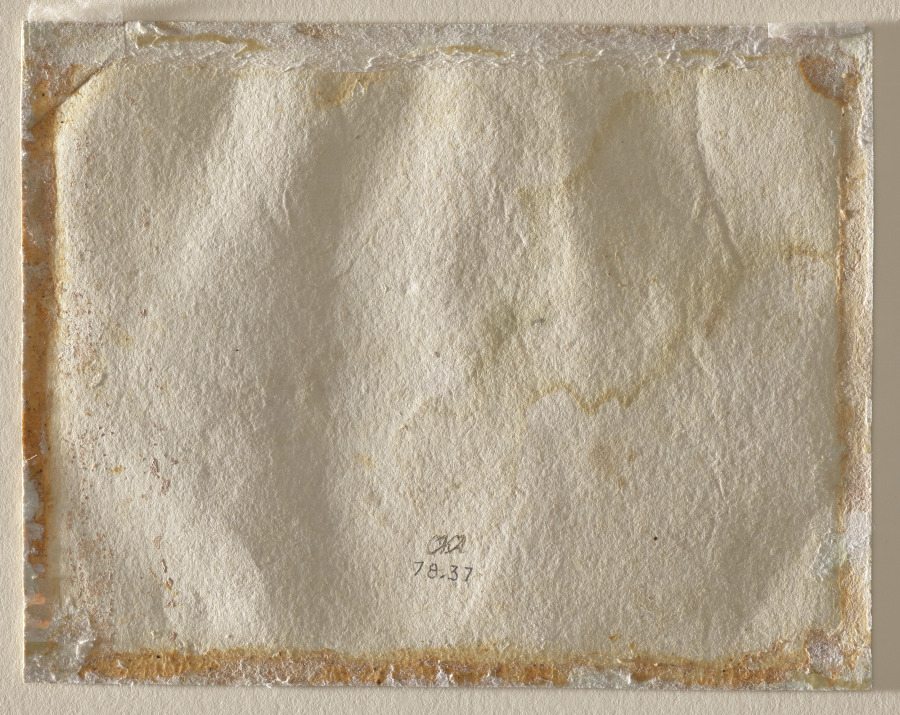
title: Studies of a Seated Female, Child's Head, and Three Studies of a Baby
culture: Italy, 16th century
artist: Raphael (Italian, 1483–1520)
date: c. 1507–8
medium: metalpoint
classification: Drawing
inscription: lower right, in brown ink: 74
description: This drawing is from Raphael’s "pink sketchbook," comprised of ten sheets of roughly equal size that each portray variations of a mother and child. Today, six of the drawings at the Palais des Beaux-Arts, Lille; two are at the British Museum; one is in a private collection; and one is in Cleveland. The small format of the sheets would have enabled the artist to carry the notebook as he traveled from Florence to Rome in 1508. Raphael used metalpoint, a technique popular in 15th- and early 16th-century Italy on a pink prepared surface. The pose of the infant's head in the drawing was based on that of the Christ child in Leonardo da Vinci's Benois Madonna, then in a private collection in Florence, with changes—such as the uplifted eyes and open mouth—made by Raphael. The curving back of the female nude is echoed in the roundness of the child's head. The three sketches of a reclining infant at the bottom of the sheet are freely handled and improvisational, relaying the child's squirming, continuous movement with repeated contour lines.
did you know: This sheet was probably once part of a sketchbook carried by the artist Raphael on a 1508 journey between Florence and Rome.